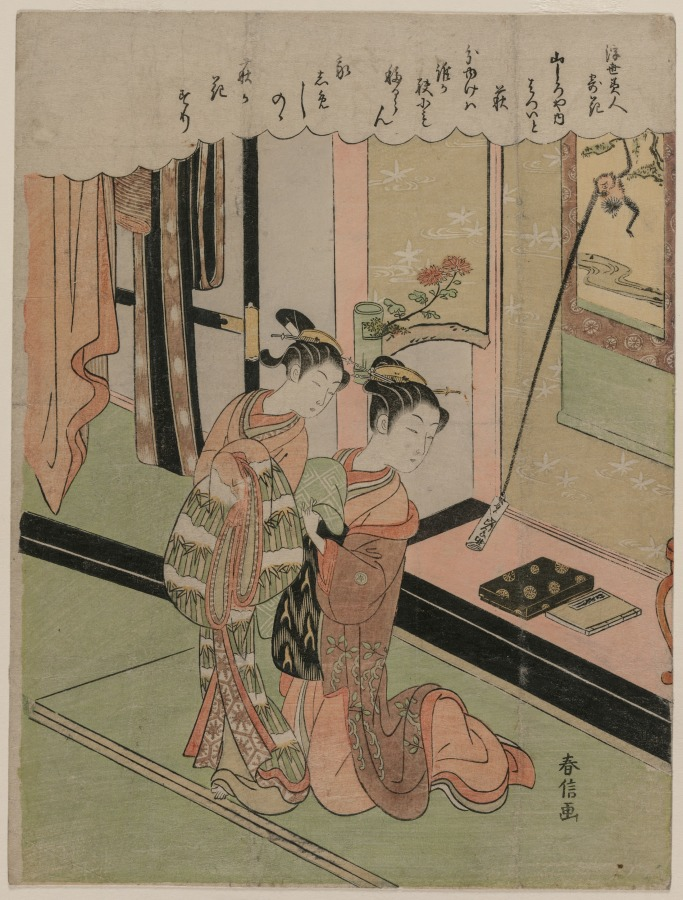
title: Hatsuito of the Yamashiroya Likened to Bush Clover, from Beauties of the Floating World Compared to Flowers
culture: Japan, Edo period (1615–1868)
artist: Suzuki Harunobu (Japanese, 1724–1770)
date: 1769–70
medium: color woodblock print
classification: Print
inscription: Signature: Harunobu ga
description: Courtesan Hatsuito of a brothel named Yamashiroya is likened to autumnal bush clover in this series comparing the qualities of courtesans to flowers. Hatsuito ties her servant’s obi sash while a gibbon emerges from a painting in the room’s viewing alcove to offer a love letter on which Hatsuito’s name appears. Gibbons reaching in vain for the moon’s reflection in water is a common metaphor for the deluded mind, and bush clover in moonlight is a popular seasonal motif. Here, the ideas are combined as the gibbon woos this unattainable beauty.